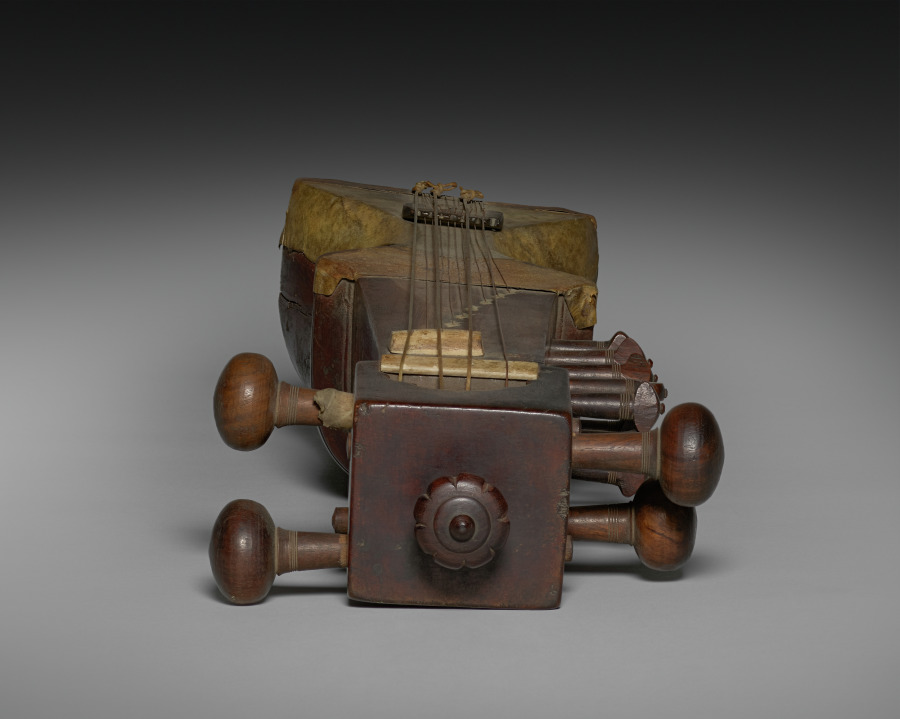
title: Sarangi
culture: East India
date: c. 1850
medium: Wood, parchment, bone or ivory, gut, and copper strings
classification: Musical Instrument